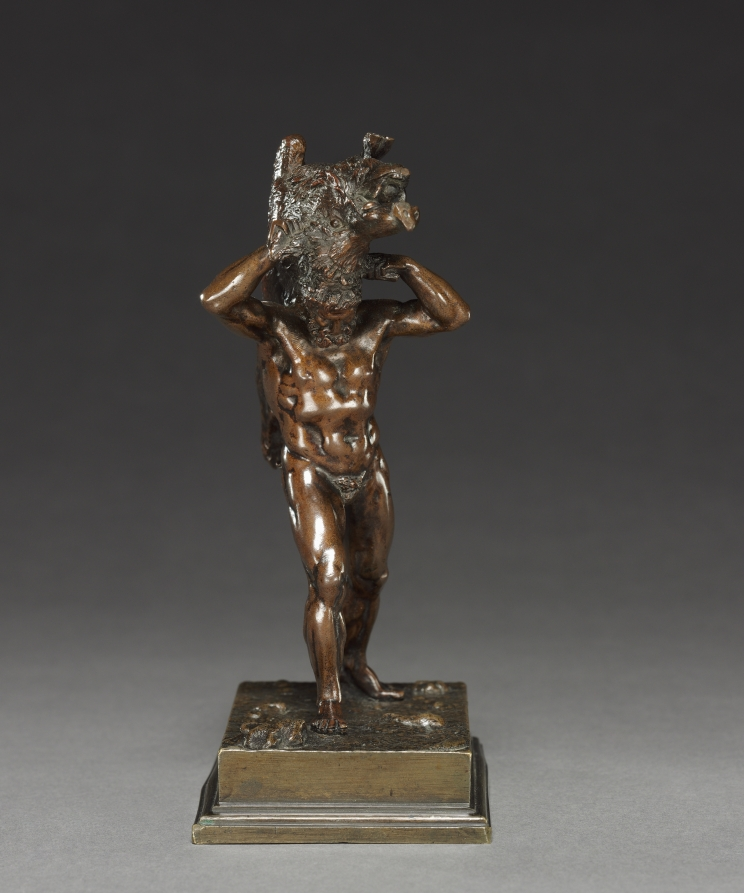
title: Hercules Carrying the Erymanthean Boar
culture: France, 19th century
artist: Antoine-Louis Barye (French, 1796–1875)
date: c. 1820–1830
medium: bronze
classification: Sculpture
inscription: signed on base: "BARYE."